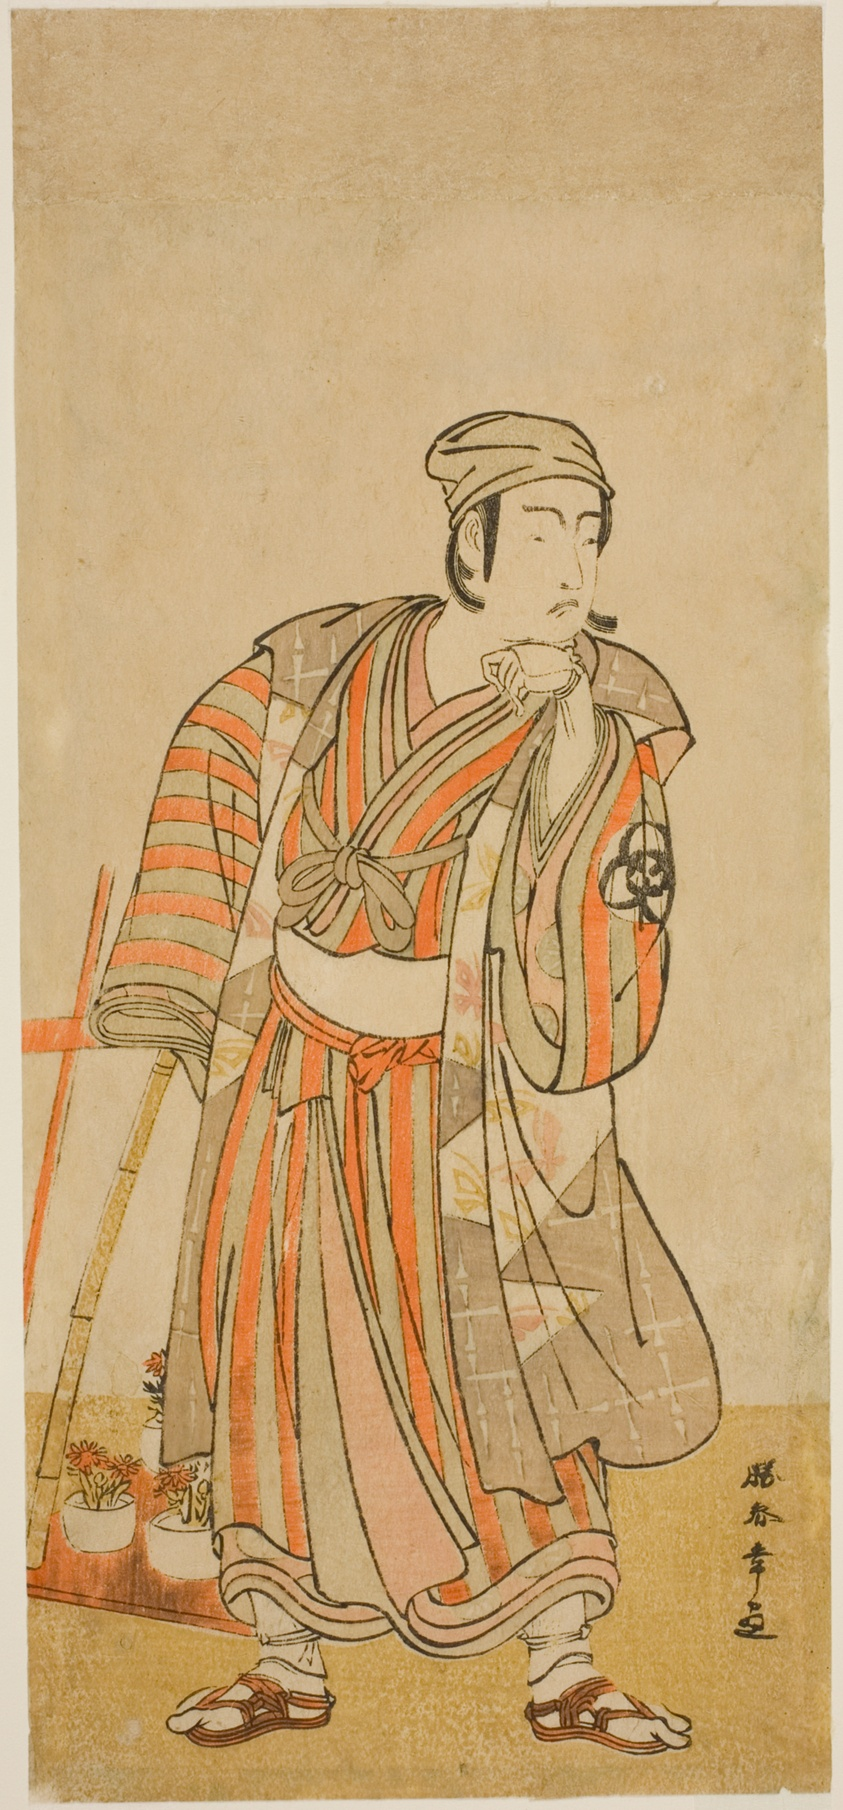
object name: Print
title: The Actor Bando Mitsugoro I as Taira no Tadamori Disguised as a Potted-Plant Seller in the Play Sakuya Kono Hana no Kaomise, Performed at the Nakamura Theater in the Eleventh Month, 1776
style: Japanese (culture or style)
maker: Katsukawa Shunsho 勝川 春章; Japanese, 1726-1792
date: c. 1776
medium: Color woodblock print; hosoban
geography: Japan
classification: woodblock print; print; asian art